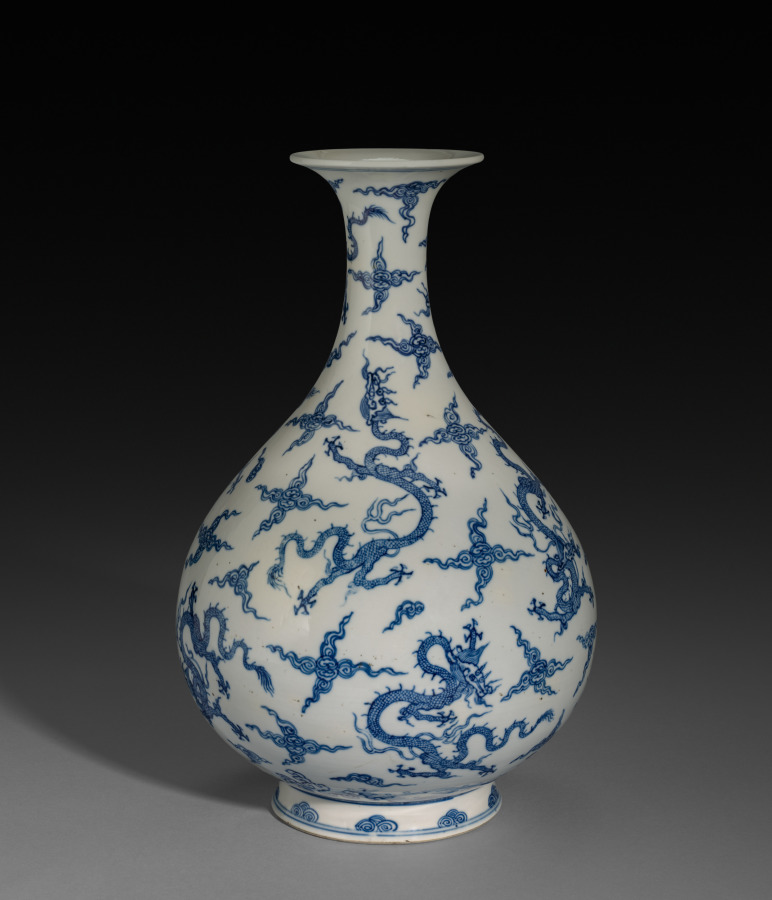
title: Bottle Vase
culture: China, Jiangxi province, Jingdezhen kilns, Qing dynasty (1644-1911), Yongzheng reign (1723-35)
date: 1723–35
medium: porcelain with underglaze blue decoration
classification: Ceramic